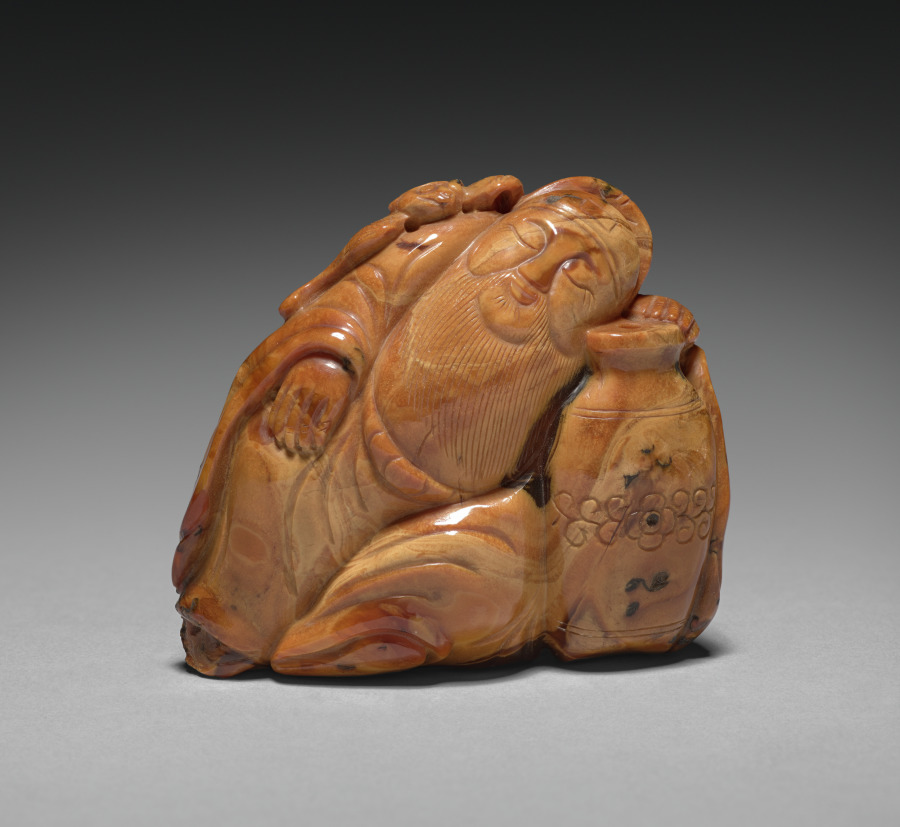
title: Li Taibo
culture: China, Qing dynasty (1644-1911)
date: 1700s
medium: amber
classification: Stone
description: This piece of ochre amber is carved in the round in the form of Li Bai 李白 (701–762), also known as Li Taibai or Li Taibo, 李太白. He was a poet in the golden age of Chinese poetry. Around a thousand poems are attributed to him. Li’s eyes are closed, an arm wrapped around his wine jar, in a drunken sleep. Perched on his shoulder is a bat, considered a lucky symbol as the Chinese word for bat, 蝠 fú, is pronounced the same as “good fortune” 福. Deer, like the one nestled behind Li, traditionally symbolize longevity and prosperity. These auspicious symbols create a bittersweet contrast with the legendary story that Li drowned while drunk when reaching to grasp the moon's reflection in the river.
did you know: Li Bai was one of the Eight Immortals of the Wine Cup, Tang dynasty scholars who enjoyed drinking alcohol.